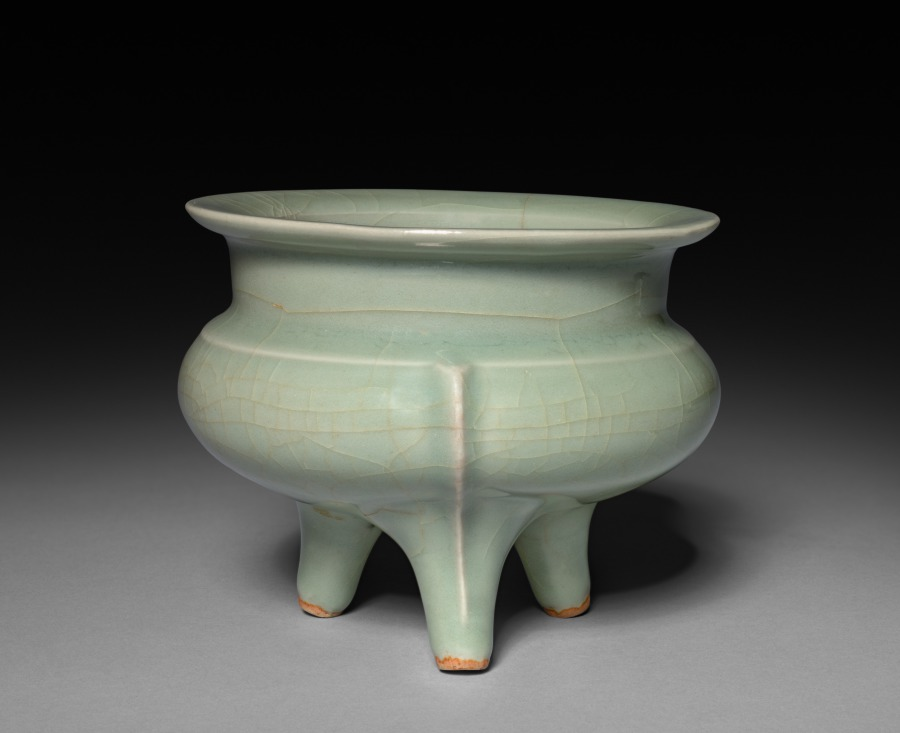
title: Incense Burner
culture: China, Southern Song dynasty (1127-1279)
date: 960–1279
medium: glazed porcelain, Longquan ware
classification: Ceramic